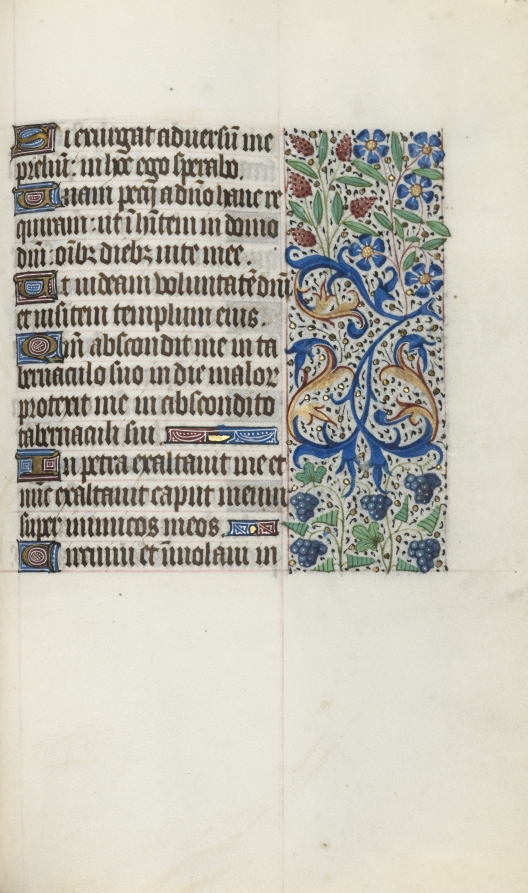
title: Book of Hours (Use of Rouen): fol. 121r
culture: France, Rouen, 15th century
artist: Master of the Geneva Latini (French, active Rouen, 1460–80)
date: c. 1470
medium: ink, tempera, and gold on vellum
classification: Bound Volume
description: In the late 1400s and early 1500s Rouen was an established and important center of book production. The city’s cathedral had a wealthy chapter that spent large sums of money to commission books and to maintain its extensive library. The stationers and booksellers would have likely been concentrated in or near the cathedral precinct. This artist, named after a manuscript now in Geneva, was Rouen’s principal illuminator during the second half of the 1400s.